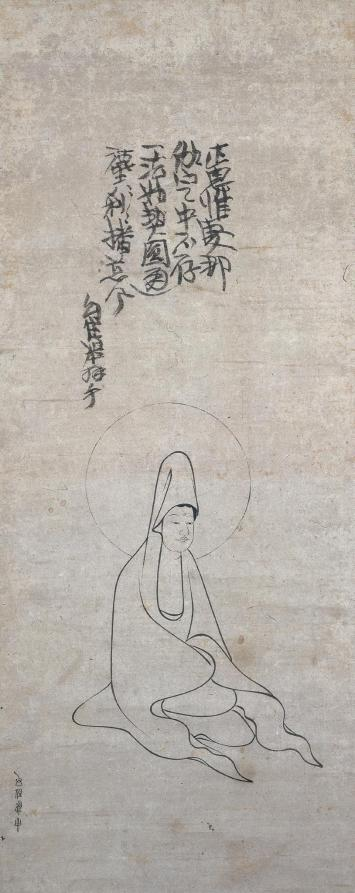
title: White-Robed Guanyin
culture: China, Yuan dynasty (1271-1368)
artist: Jueji Yongzhong (Chinese, active around 1300)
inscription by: Zhongfeng Mingben (Chinese, 1263–1323)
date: late 1200s–early 1300s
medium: hanging scroll; ink on paper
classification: Painting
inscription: Artist's signature: Huanzhu Yongzhong. Inscription by Zhongfeng Mingben: The right thinking [Samkalpa] is embodied within His deep meditation on the Buddha [naga-samadhi]. Retaining not even one single object of thought, A perfect harmony was wonderfully achieved. In the endless time and space, His all-embracing compassion prevails. [signed] Mingben of Huanzhu paying his respects.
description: Guanyin, the bodhisattva of infinite compassion (Avalokiteshvara, in Sanskrit), reveals himself in many forms. According to Buddhist belief, one such manifestation is the white-robed Guanyin sitting on a rock on the island of Putuo (Potalaka, in Sanskrit), located along the coast not far from Ningbo, in Zhejiang Province, China. Here, the figure was swiftly drawn in only a few ink lines. The inscription above is by Zhongfeng Mingben, perhaps the most widely respected and influential Chan (Zen in Japanese) master in the Yuan dynasty. The artist’s signature is a single line below on the left: Huanzhu Yongzhong.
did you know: The CMA collection includes a drawing by a Japanese priest, CMA 1978.47.2, inspired by this composition.